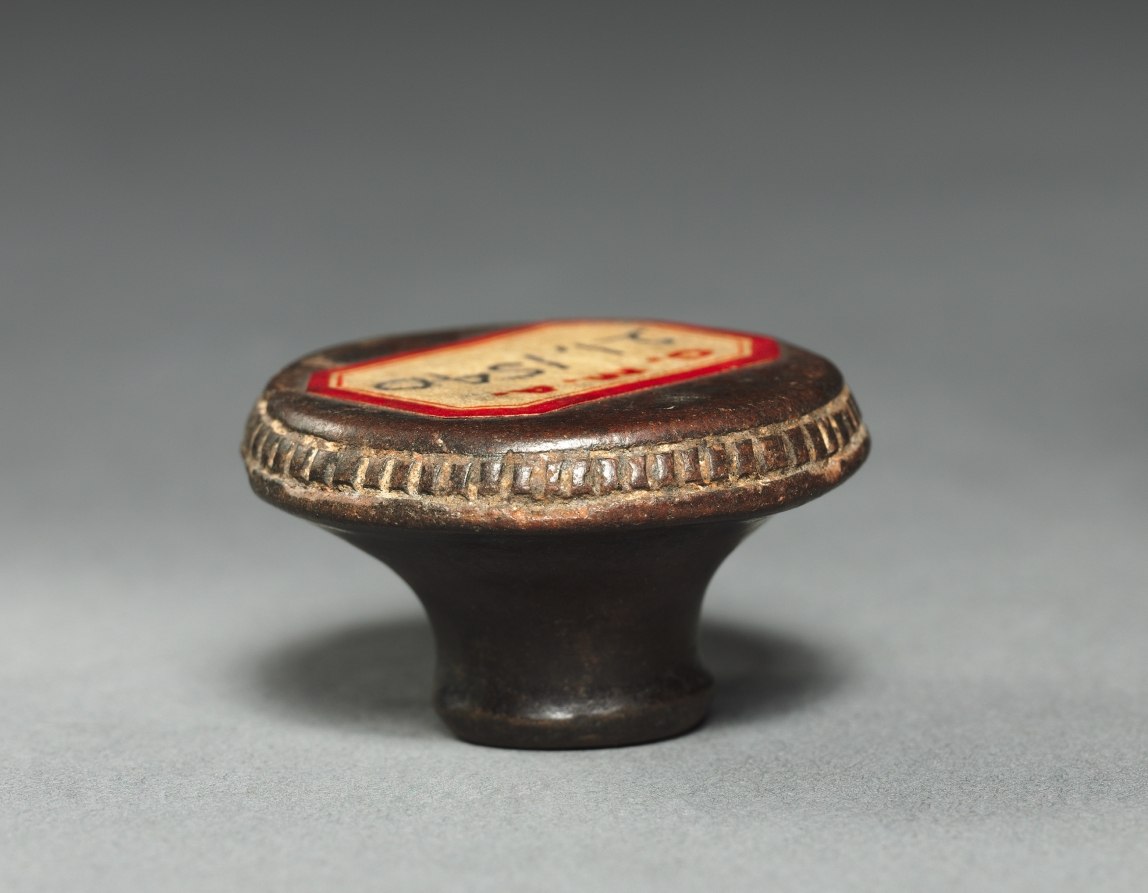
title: Button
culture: Colombia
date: before 1921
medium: black ware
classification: Ceramic